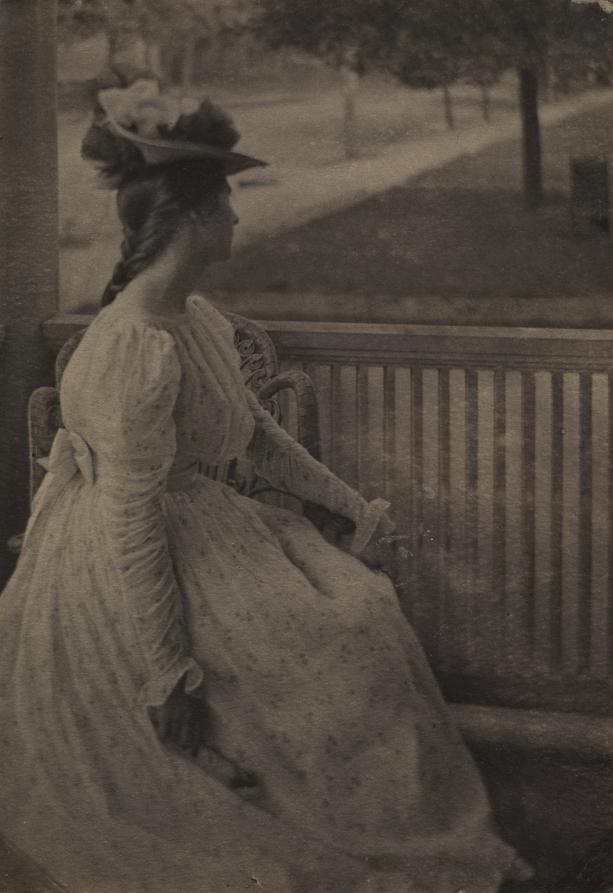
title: On the Porch (Julia Hall McCune)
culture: America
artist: Clarence H. White (American, 1871–1925)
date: c. 1897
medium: platinum print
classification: Photograph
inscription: Written in pencil on verso: "21 [circled]"; "33 [circled]"; "mat"; " 'On the Porch' / portrait of Julia McCune / later Mrs. Walter Flory / about 1897(?) / photo by Clarence White / Taken on his front porch N. 5th St . /Newark Ohio."